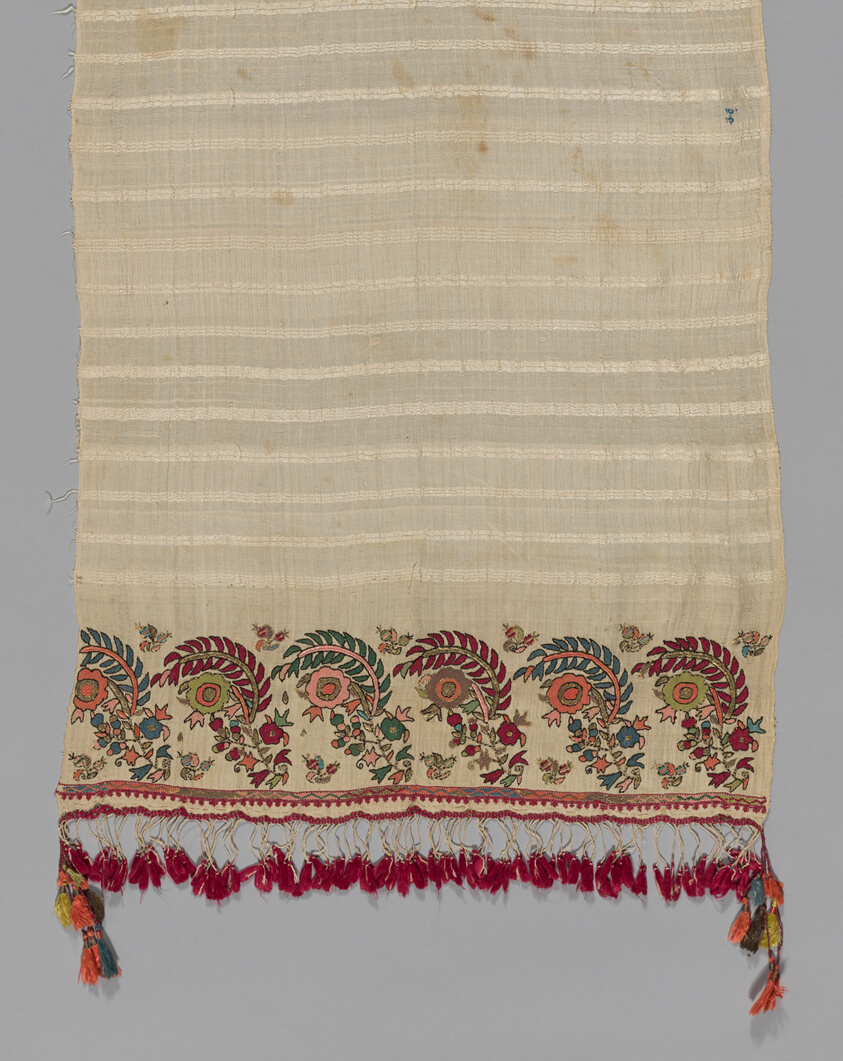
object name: Textile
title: Towel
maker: Greece, Northern Sporades Islands, Lesbos, Mytilene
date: 18th century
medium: Silk, plain weave; embroidered with silk and gilt-metal-strip-wrapped silk in Bosnian, flat, double running, twined double running, and satin stitches; edged with plied warp fringe and silk braided fringe with silk and gilt-metal-strip-wrapped silk tassels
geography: Lésvos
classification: textile; needlework (visual works)